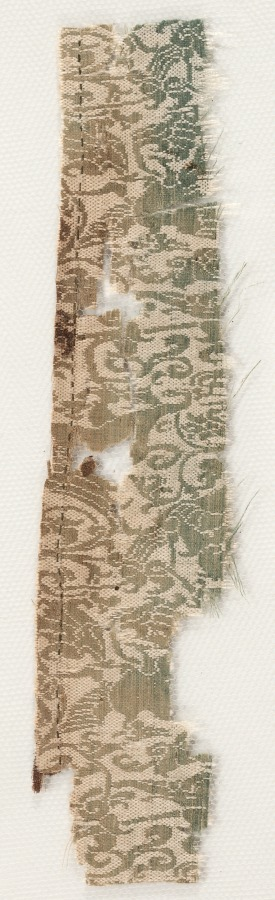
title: Fragments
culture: Egypt, Ayyubid, 12th century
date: 1100s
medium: tabby with supplementary weft; silk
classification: Textile